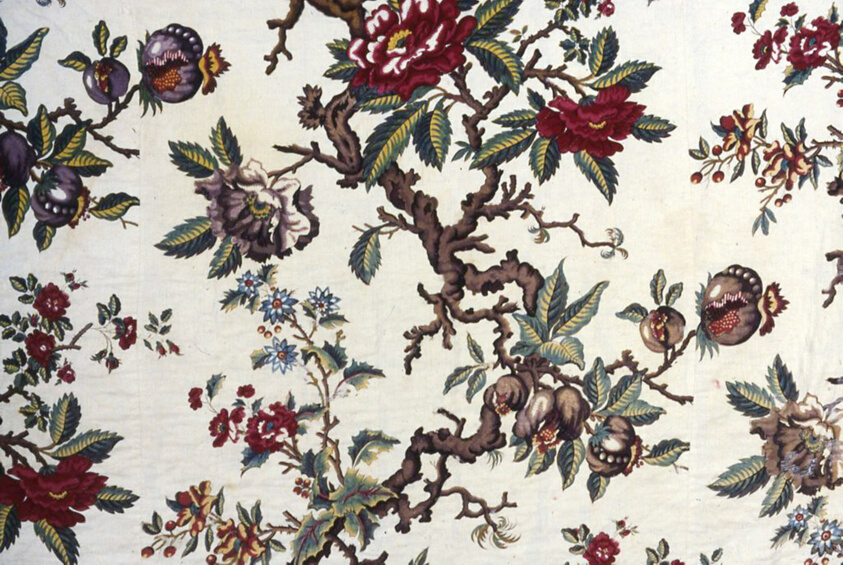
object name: Textile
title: Panel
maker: France, Alsace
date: c. 1790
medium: Cotton, plain weave; block printed; backed and padded with cotton; quilted with linen thread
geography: France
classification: textile; weaving - printed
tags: foliage, flowers, fruit